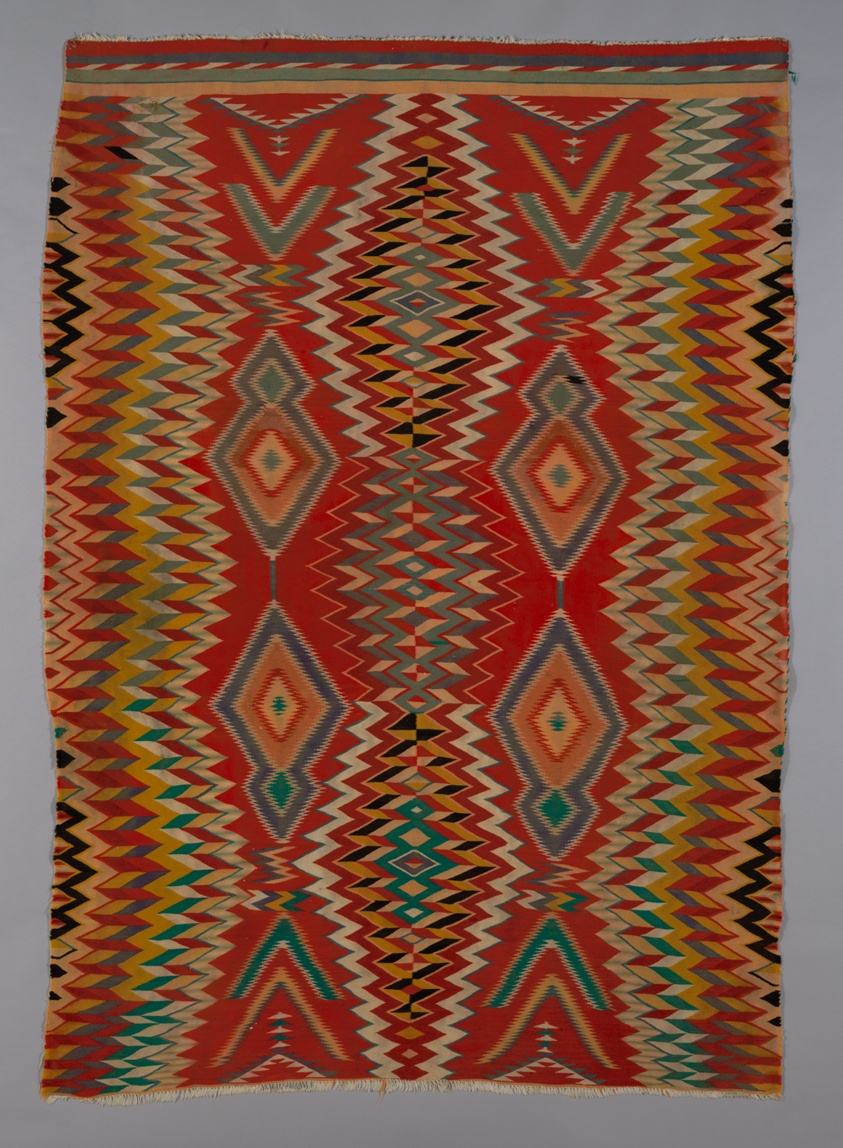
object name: Textile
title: "Germantown Eye-Dazzler" Rug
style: navajo, north american, indigenous Art, native american, indigenous, native north american, eye-dazzler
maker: Navajo (Diné) (Arizona, New Mexico, and Utah, United States)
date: c. 1800/90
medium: Cotton and wool dovetailed tapestry weave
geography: New Mexico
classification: textile; weaving - rug